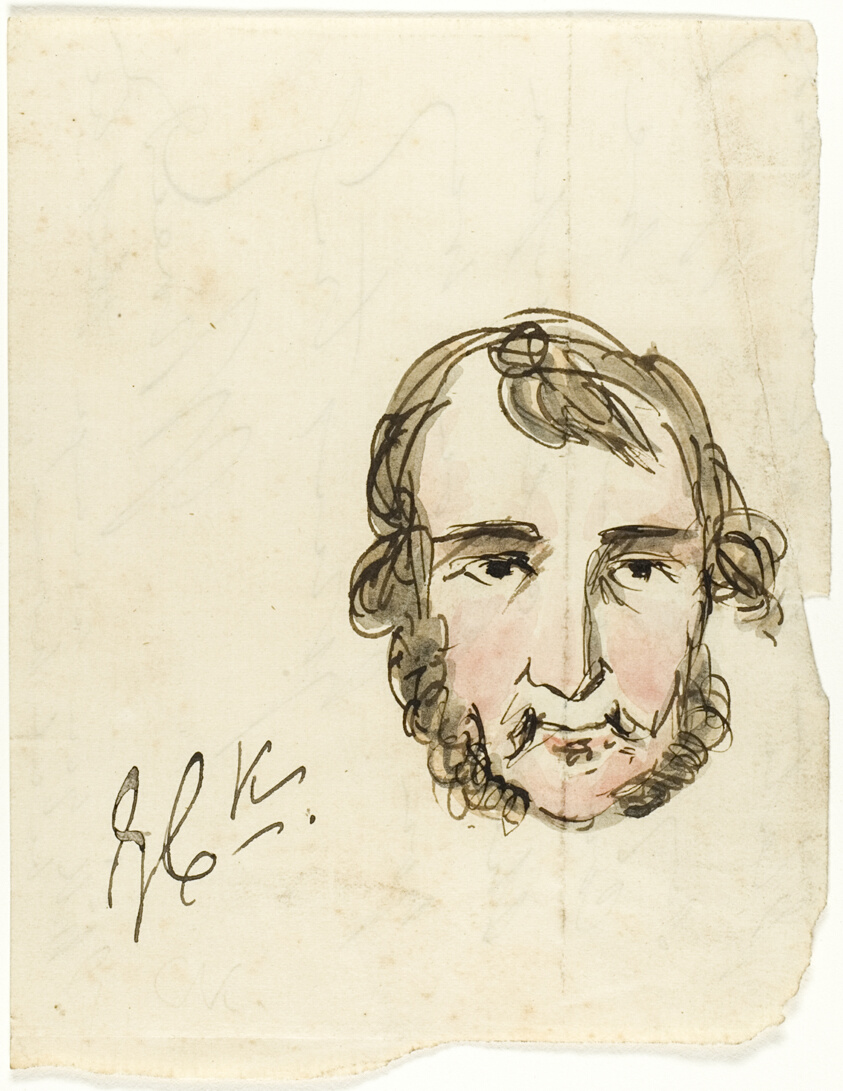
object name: Drawing and Watercolor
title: Self-Portrait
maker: George Cruikshank (English, 1792-1878)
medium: Pen and brown ink and brush and gray wash, and watercolor wash, on cream laid paper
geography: England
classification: pen and ink drawings; drawings (visual works); prints and drawing